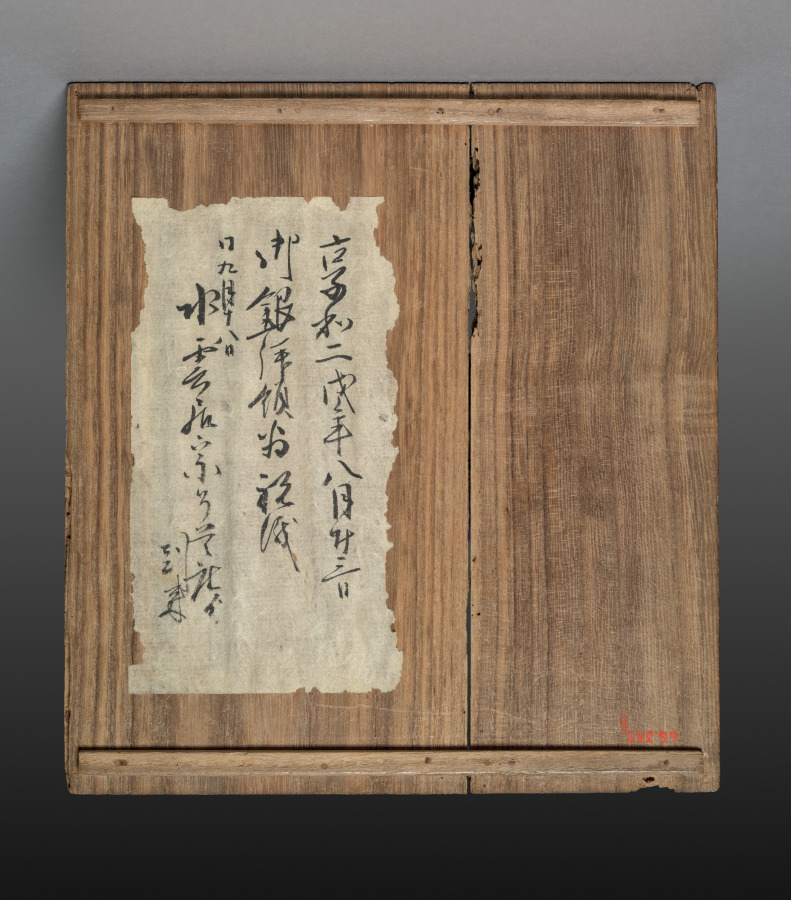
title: Square Dish with Design of Plovers over Waves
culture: Japan, Edo period (1615–1868)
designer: Ogata Kōrin (Japanese, 1658–1716)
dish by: Ogata Kenzan (Japanese, 1663–1743)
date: c. 1700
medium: Glazed stoneware with iron oxide underglaze slip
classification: Ceramic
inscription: design painted by Korin and signed "Jakumei Korin Gaku"; inner and outer faces of four walls probably painted by an assistant at the kiln, underside of dish signed, "Kenzan."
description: The Ogata brothers Kōrin and Kenzan often collaborated on ceramics. This dish is one of a set used for serving tea cakes. Kenzan shaped the dish, after which Kōrin drew the iron oxide design of plovers, a type of shorebird, flying over waves. Kenzan then covered the object with a clear glaze and fired it. Kōrin placed his signature next to his design, while Kenzan signed the back.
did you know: The design of plovers flying over waves derives from Heian period (900s–1100s) literature and later lacquerware designs.